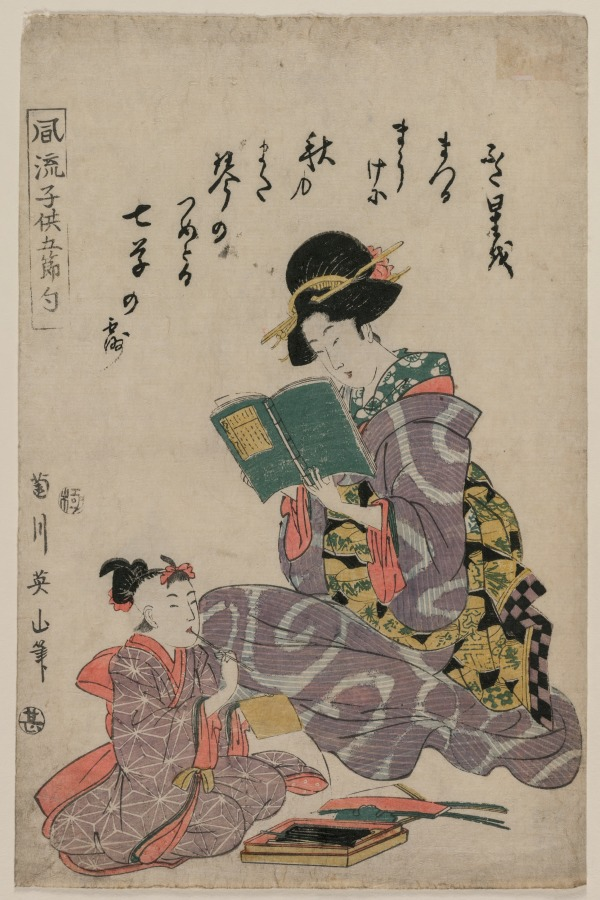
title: Tanabata, from the series Fashionable Children of the Five Festivals (Fūryū kodomo gosekku)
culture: Japan, Edo period (1615–1868)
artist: Kikukawa Eizan (Japanese, 1787–1867)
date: c. 1809–29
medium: Color woodblock print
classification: Print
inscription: Signed: 菊川英山筆